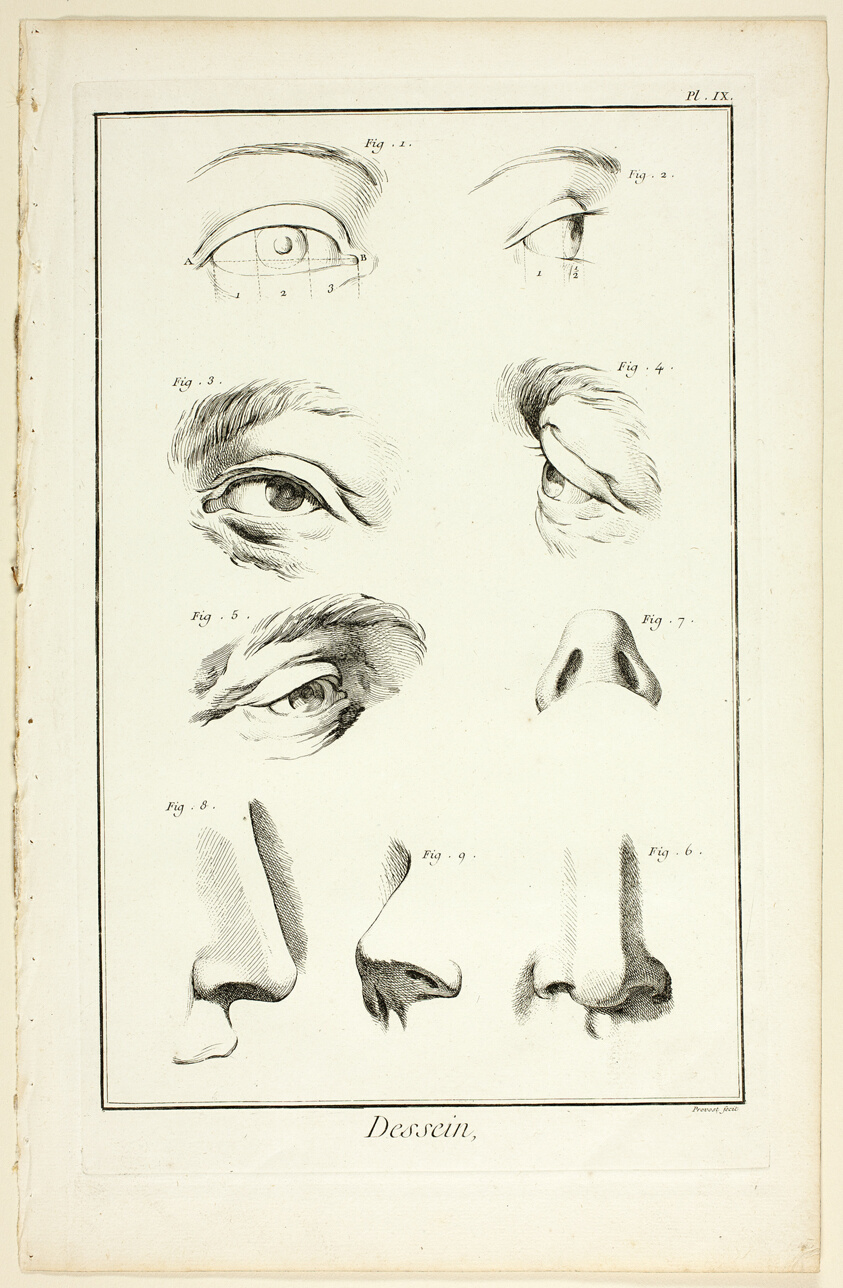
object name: Print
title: Design: Facial Anatomy from Encyclopédie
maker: Benoît-Louis Prévost (French, c. 1735-1809); published by André le Breton (French, 1708-1779), Michel-Antoine David (French, c. 1707-1769), Laurent Durand (French, 1712-1763), and Antoine-Claude Briasson (French, 1700-1775)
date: 1762/77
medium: Etching, with engraving, on cream laid paper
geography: France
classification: etching; print; prints and drawing